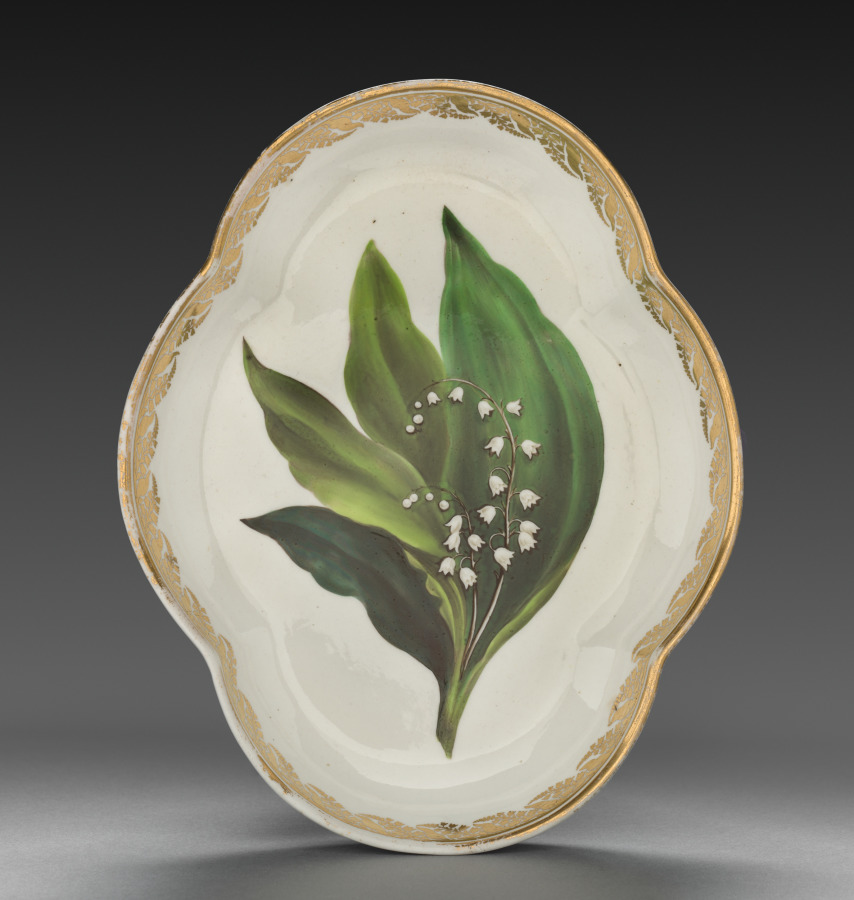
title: Quatrelobed Dish from Dessert Service: Lily of the Valley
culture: England, Derby, 18th century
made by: Derby (Crown Derby Period) (British)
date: c. 1800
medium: porcelain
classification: Ceramic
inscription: inscribed in gray on back: Convalaria Majalis./Lilies of the Valley./crown/crossed batons and dots/D/115.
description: Each dish is decorated with recognizable plants, the names of which are inscribed on the base in both Latin and English. Identifying the blossoms only became customary in the late 18th century when a single piece of porcelain was decorated with one species, and flowers were represented along with leaves, stems, seed pods, and roots. All of this reflects Carolus Linnaeus’s recent invention of a scientific method to categorize all known flora. The decorations on the Derby factory’s products derive from contemporary English botanical publications. For instance, illustrations in William Curtis’s The Botanical Magazine served as models for the French marigold and nettle-leaved bell flower on the dessert service.